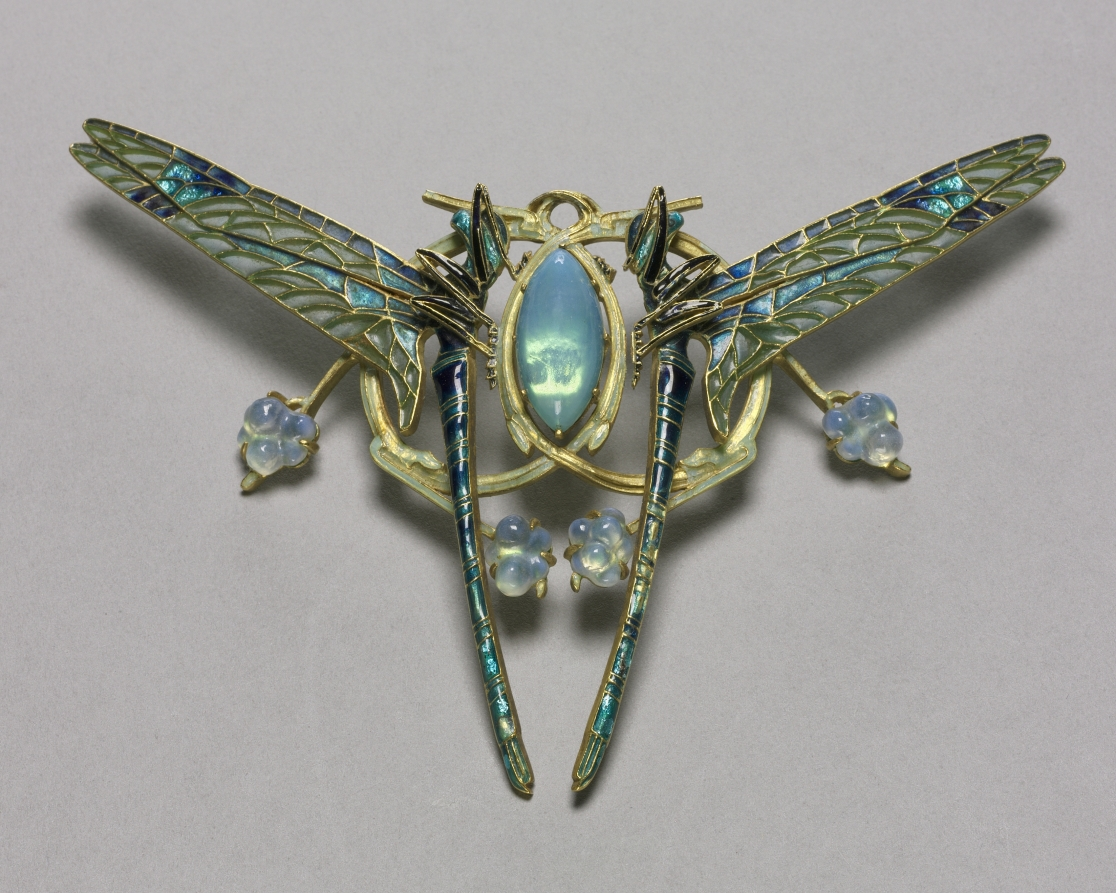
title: Dragon Fly Brooch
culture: France, late 19th-early 20th Century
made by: René Lalique (French, 1860–1945)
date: c. 1900–1910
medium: gold with plique-a-jour and cloisonne enamels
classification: Jewelry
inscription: inscribed on side of mount to the right: LALIQUE.